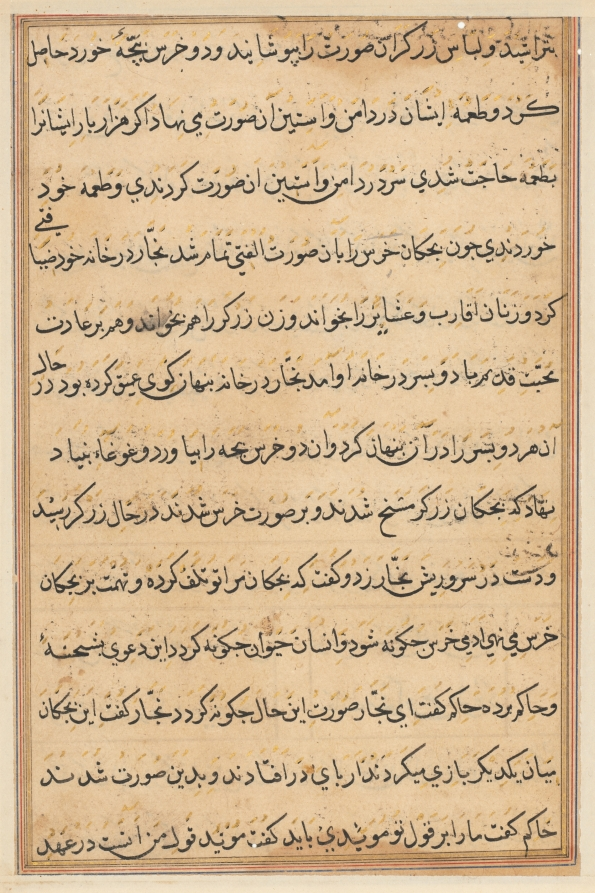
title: Page from Tales of a Parrot (Tuti-nama): text page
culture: Mughal India, court of Akbar (reigned 1556–1605)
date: c. 1560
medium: gum tempera, ink, and gold on paper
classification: Painting